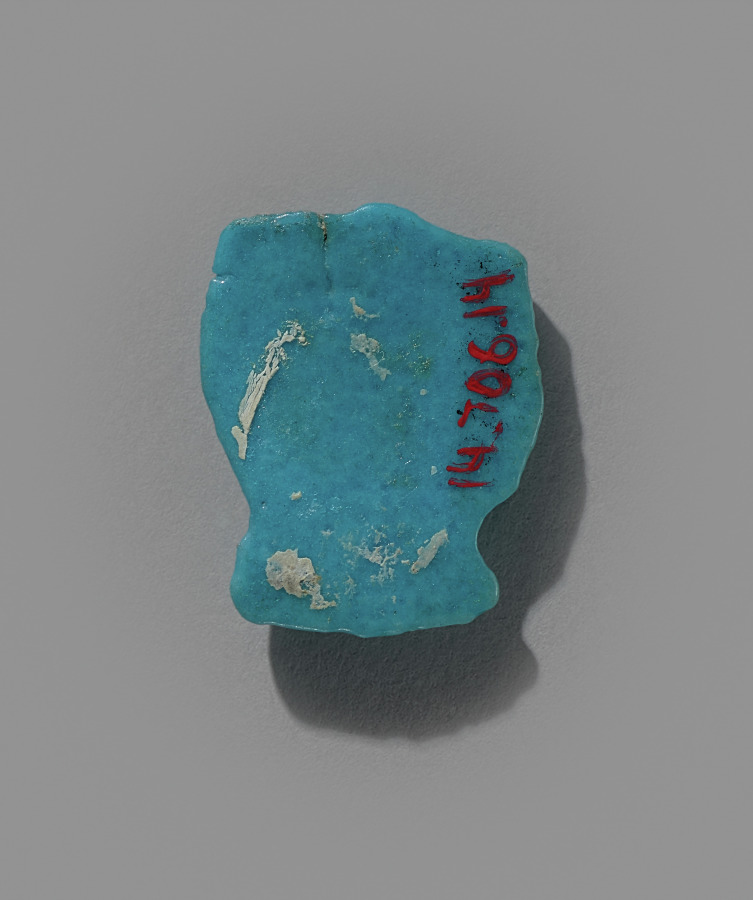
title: Food Model Amulet: Brace of Duck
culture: Egypt, New Kingdom (1540–1069 BCE), Dynasties 19–20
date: 1295–1069 BCE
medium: turquoise faience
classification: Amulets